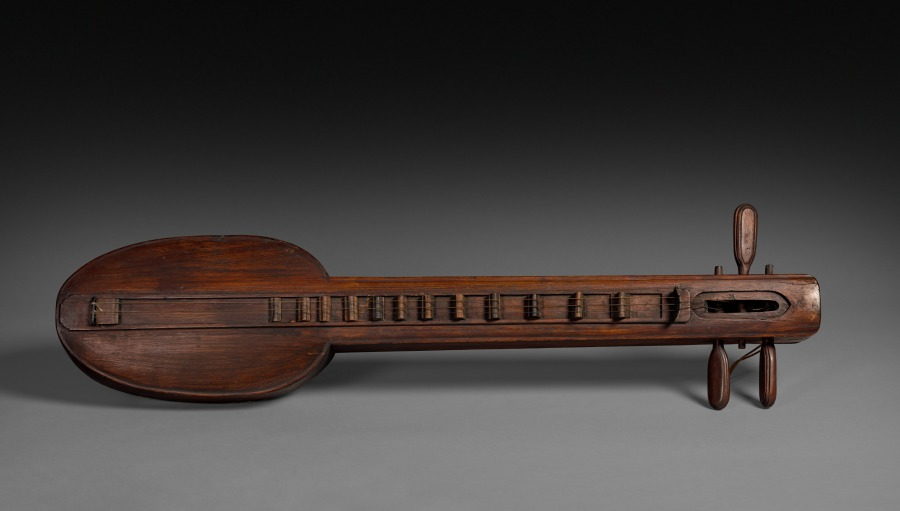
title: Ta'khe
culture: Cambodia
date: 1800s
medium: Tropical hardwood with ferrous metal and silk strings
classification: Musical Instrument